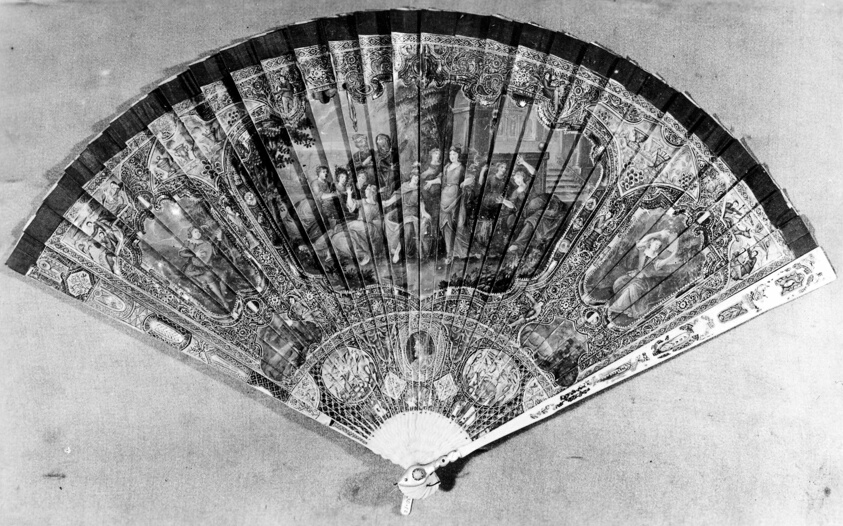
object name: Costume and Accessories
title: Fan (Vernis Martin Type)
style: louis xv, european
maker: France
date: Louis XV period (1715–1774), 1725–1774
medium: Painted and lacquered ivory brisée fan with mother-of-pearl insets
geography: France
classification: textile; fan - misc; costume accessory - folding fan; costume